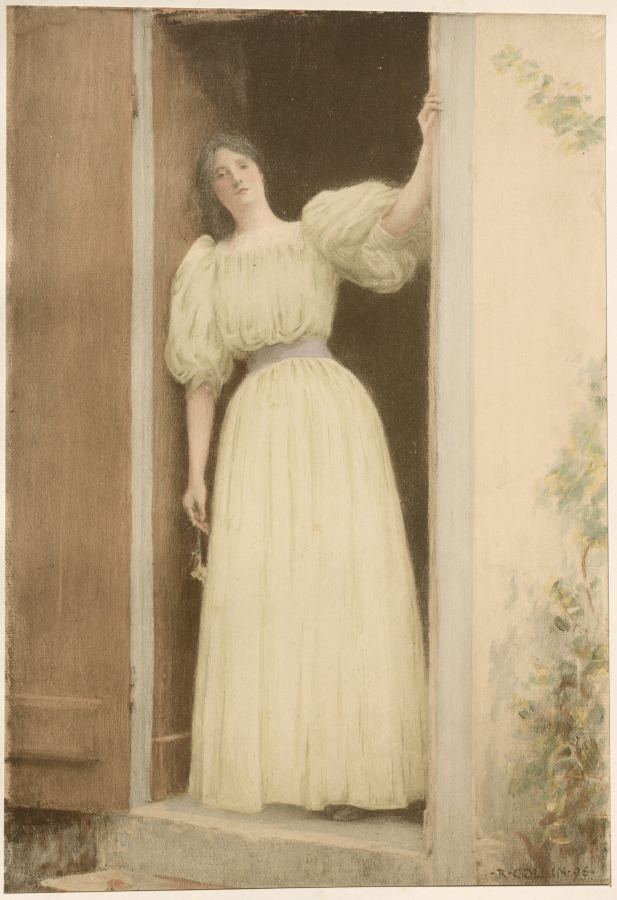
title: Le Départ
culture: France, Paris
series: L'Estampe Moderne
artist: Louis Joseph Raphaël Collin (French, 1830–1916)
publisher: Imprimerie Champenois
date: published 1899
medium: Color lithograph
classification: Bound Volume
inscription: In plate, lower right corner of image: -R- Collin-96-; lower right corner of secondary support: blindstamp of l'Estampe Moderne (Lugt 2790)